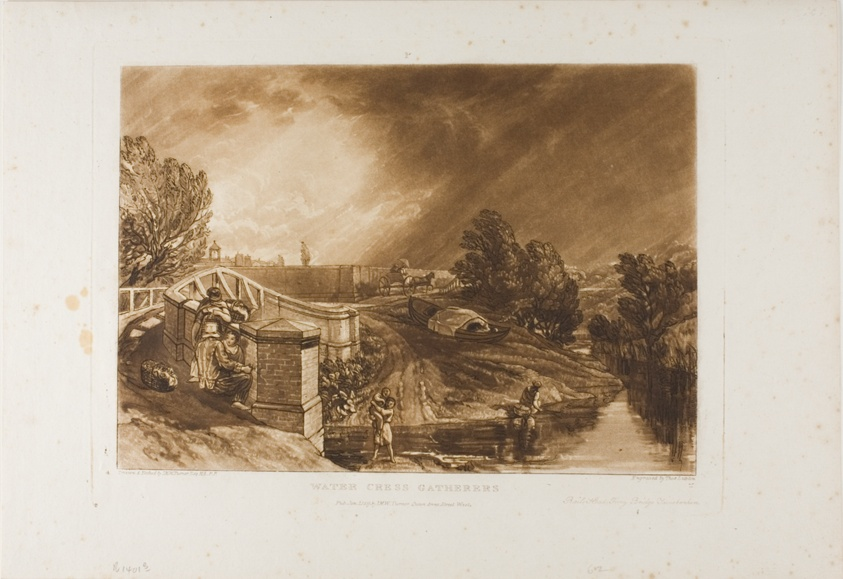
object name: Print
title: Watercress Gatherers, plate 62 from Liber Studiorum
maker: Joseph Mallord William Turner (English, 1775-1851); Engraved by Thos. Lupton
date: published January 1, 1819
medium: Etching and engraving in brown on ivory wove paper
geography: England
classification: etching; print; prints and drawing